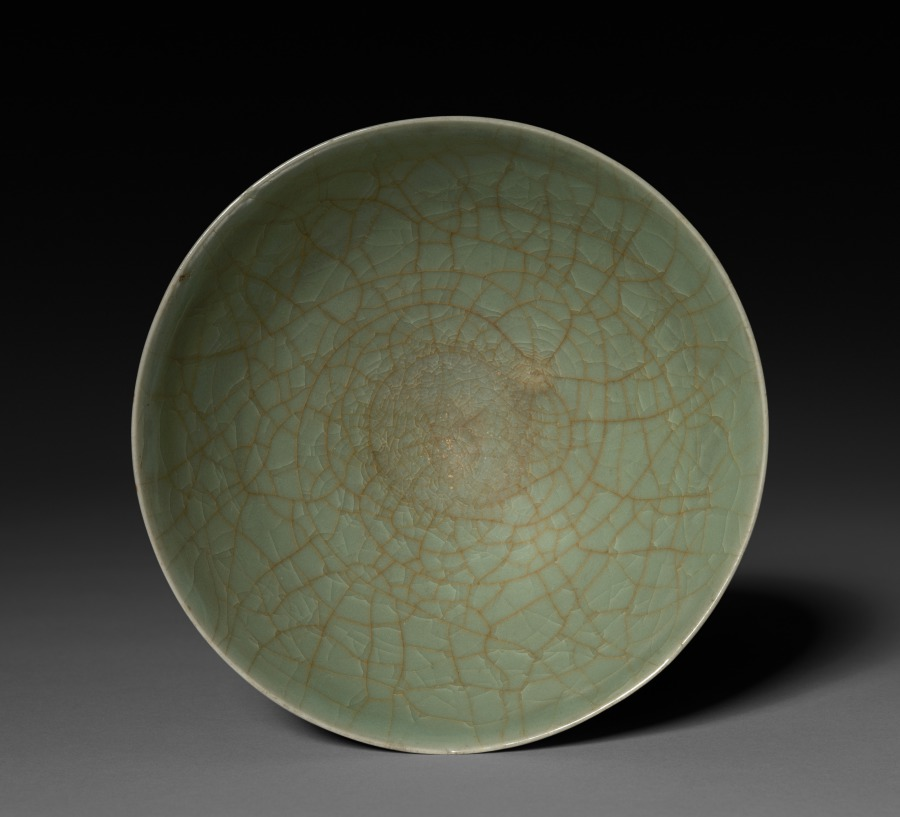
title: Bowl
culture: China, Southern Song dynasty (1127-1279)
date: 1200s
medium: glazed buff stoneware, Southern Celadon ware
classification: Ceramic